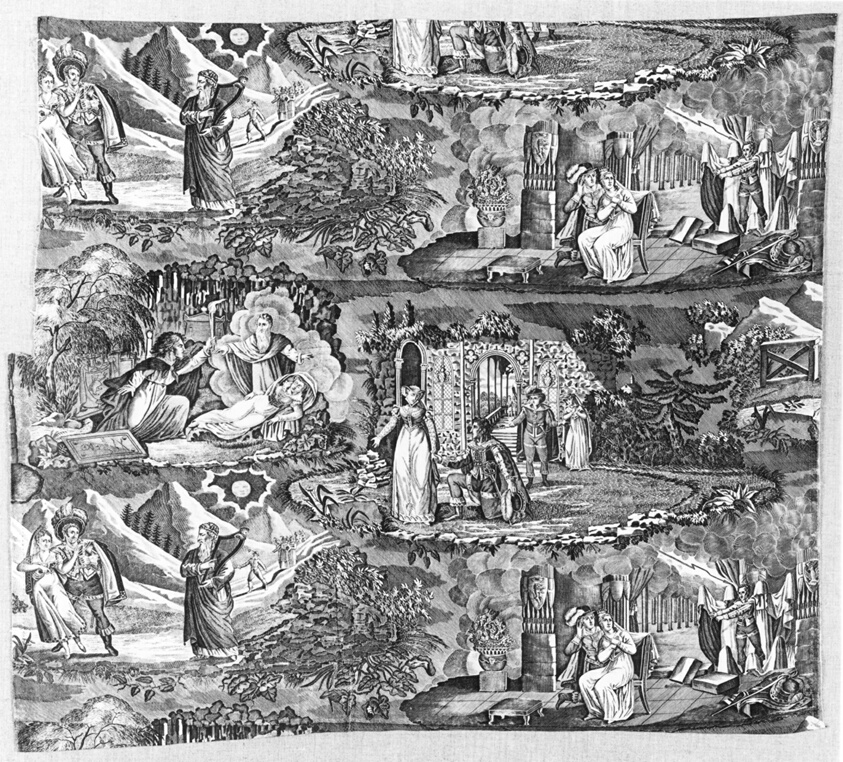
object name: Textile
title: Le Vampire (The Vampyre) (Furnishing Fabric)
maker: France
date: c. 1820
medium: Cotton, plain weave; engraved roller printed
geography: France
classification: textile; weaving - printed; furnishing textile